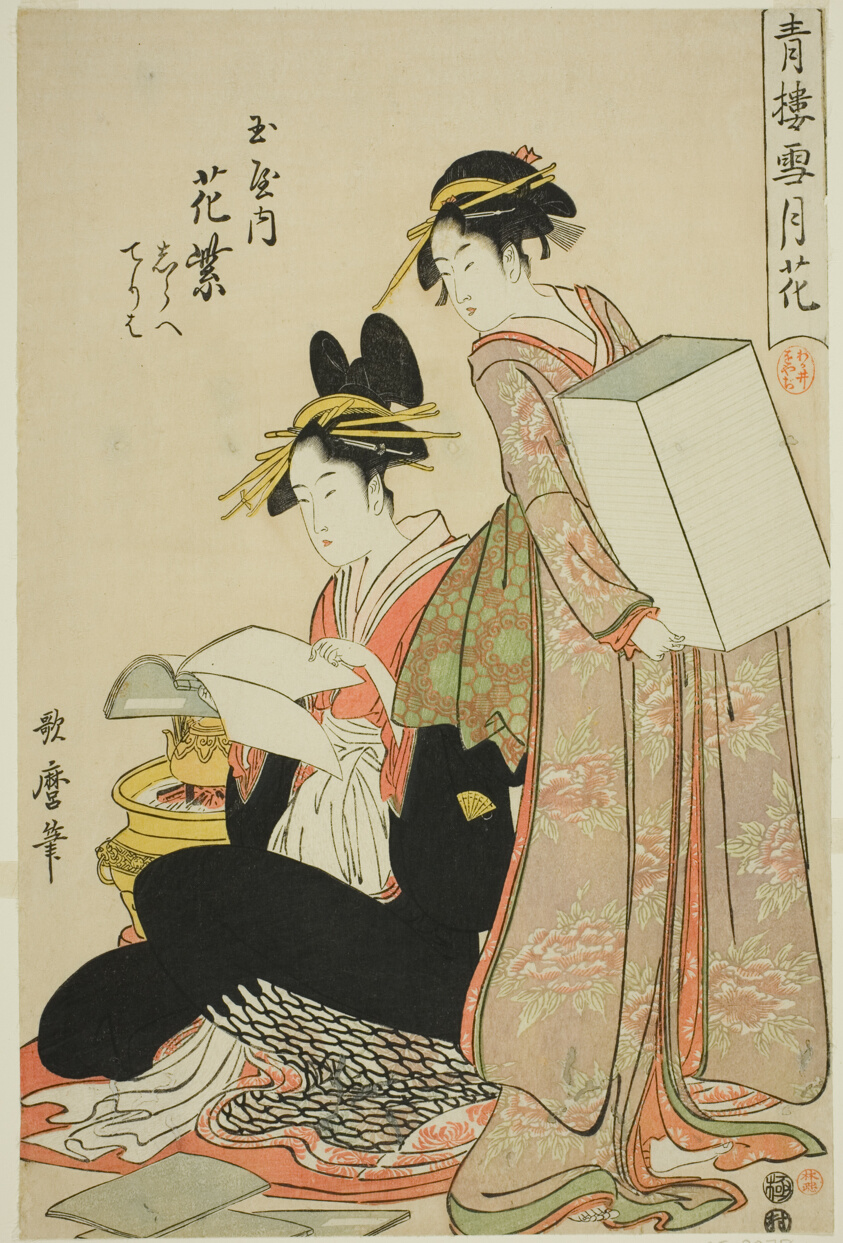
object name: Print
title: Hanamurasaki of the Tamaya, (kamuro:) Shirabe, Teriha, Flowers from the series Snow, Moon and Flowers in Yoshiwara (Seiro setsugekka) (Tamaya uchi Hanamurasaki, Shirabe, Teriha)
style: Japanese (culture or style)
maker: Kitagawa Utamaro 喜多川 歌麿; Japanese, 1753 (?)-1806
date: 1793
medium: Color woodblock print; oban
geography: Japan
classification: woodblock print; print; asian art